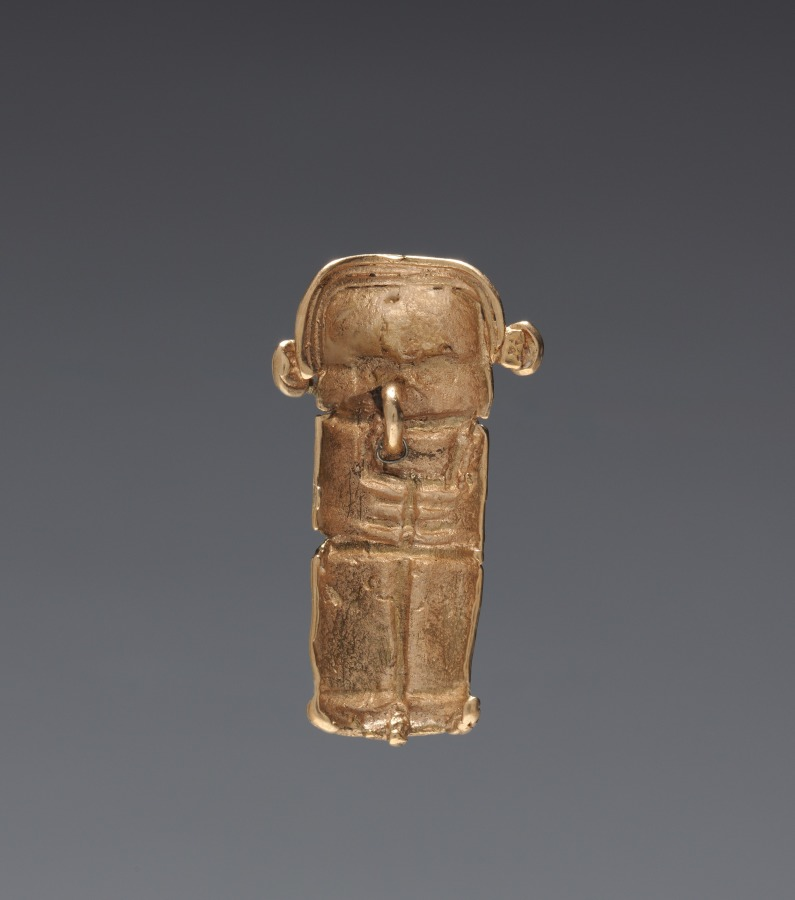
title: Necklace Figurine Bead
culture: Colombia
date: 1–700 CE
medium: cast gold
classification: Jewelry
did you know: Working with gold dates back to at least 500 BC in Ecuador and Colombia.